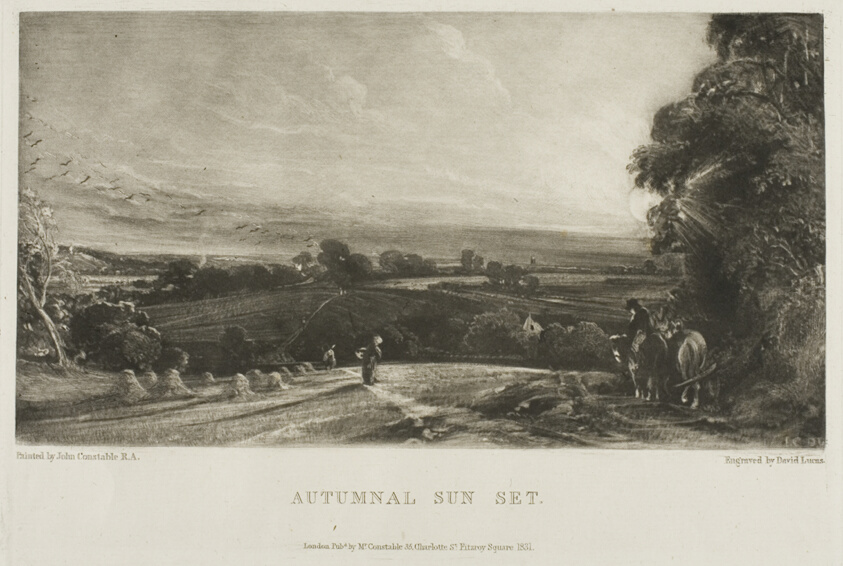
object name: Print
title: Autumnal Sun Set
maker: David Lucas (English, 1802-1881); after John Constable (English, 1776-1837)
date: 1831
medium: Mezzotint on paper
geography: England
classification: mezzotint; print; prints and drawing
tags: landscapes